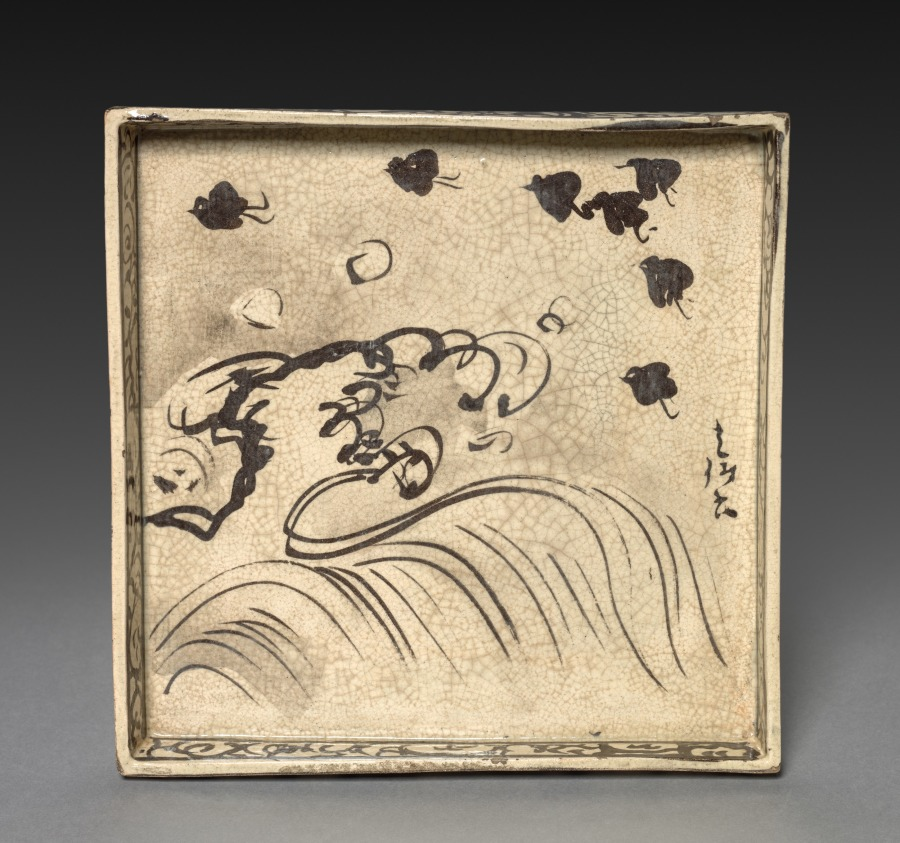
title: Square Dish with Design of Plovers over Waves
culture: Japan, Edo period (1615–1868)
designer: Ogata Kōrin (Japanese, 1658–1716)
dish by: Ogata Kenzan (Japanese, 1663–1743)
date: c. 1700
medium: Glazed stoneware with iron oxide underglaze slip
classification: Ceramic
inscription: design painted by Korin and signed "Jakumei Korin Gaku"; inner and outer faces of four walls probably painted by an assistant at the kiln, underside of dish signed, "Kenzan."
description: The Ogata brothers Kōrin and Kenzan often collaborated on ceramics. This dish is one of a set used for serving tea cakes. Kenzan shaped the dish, after which Kōrin drew the iron oxide design of plovers, a type of shorebird, flying over waves. Kenzan then covered the object with a clear glaze and fired it. Kōrin placed his signature next to his design, while Kenzan signed the back.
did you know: The design of plovers flying over waves derives from Heian period (900s–1100s) literature and later lacquerware designs.